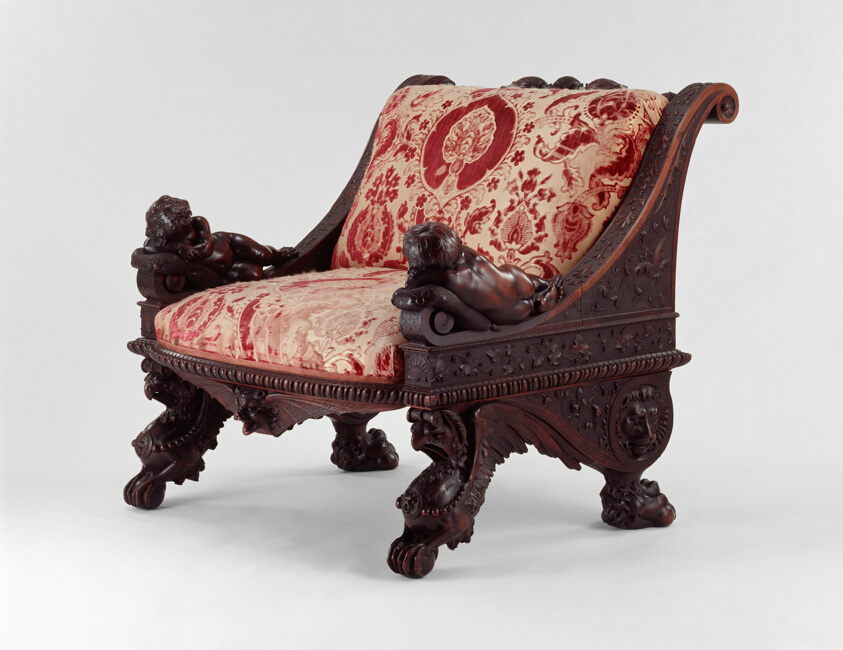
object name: Furniture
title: Armchair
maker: Luigi Frullini; Italian, 1839–1897; Florence, Italy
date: 1876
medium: Walnut and cut velvet upholstery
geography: Florence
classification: seating; furniture; european decorative arts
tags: furniture